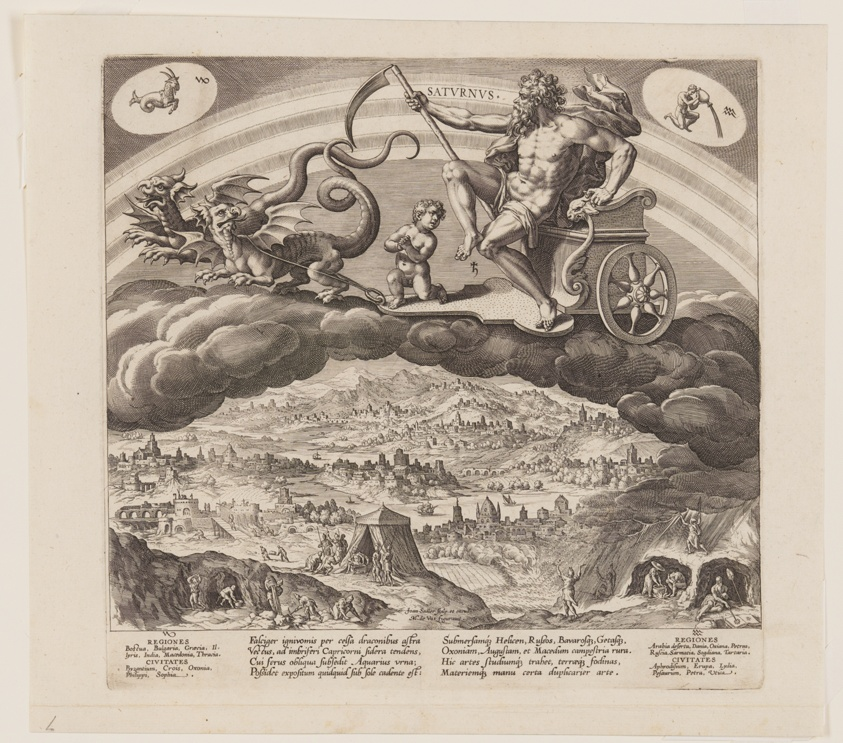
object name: Print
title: Saturnus, from The Seven Planets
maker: Jan Sadeler I (Flemish, 1550–1600); after Maarten de Vos (Flemish, 1532–1603)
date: 1585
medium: Engraving on ivory laid paper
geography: Flanders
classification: engraving; paper; print; prints and drawing